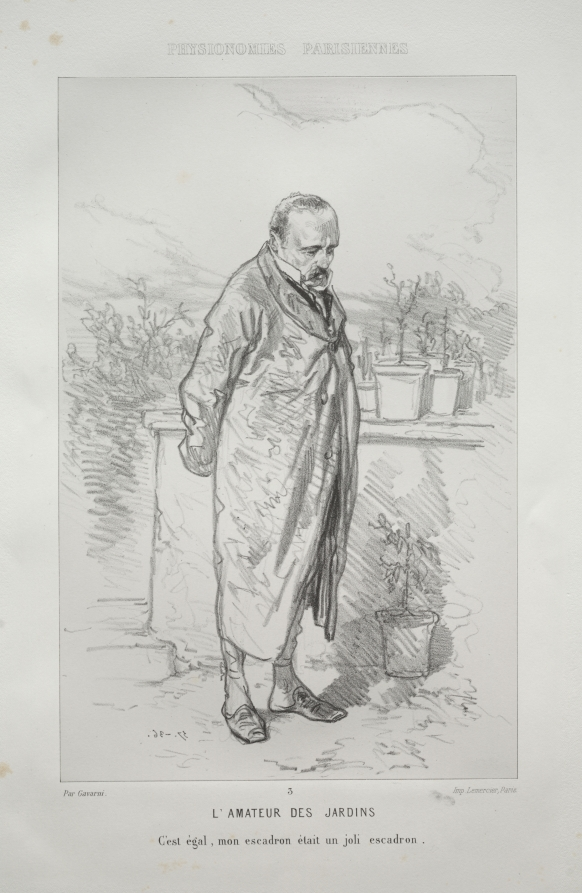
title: L'Amateur des Jardins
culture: France, 19th century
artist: Paul Gavarni (French, 1804–1866)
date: c. 1857–58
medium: lithograph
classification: Print